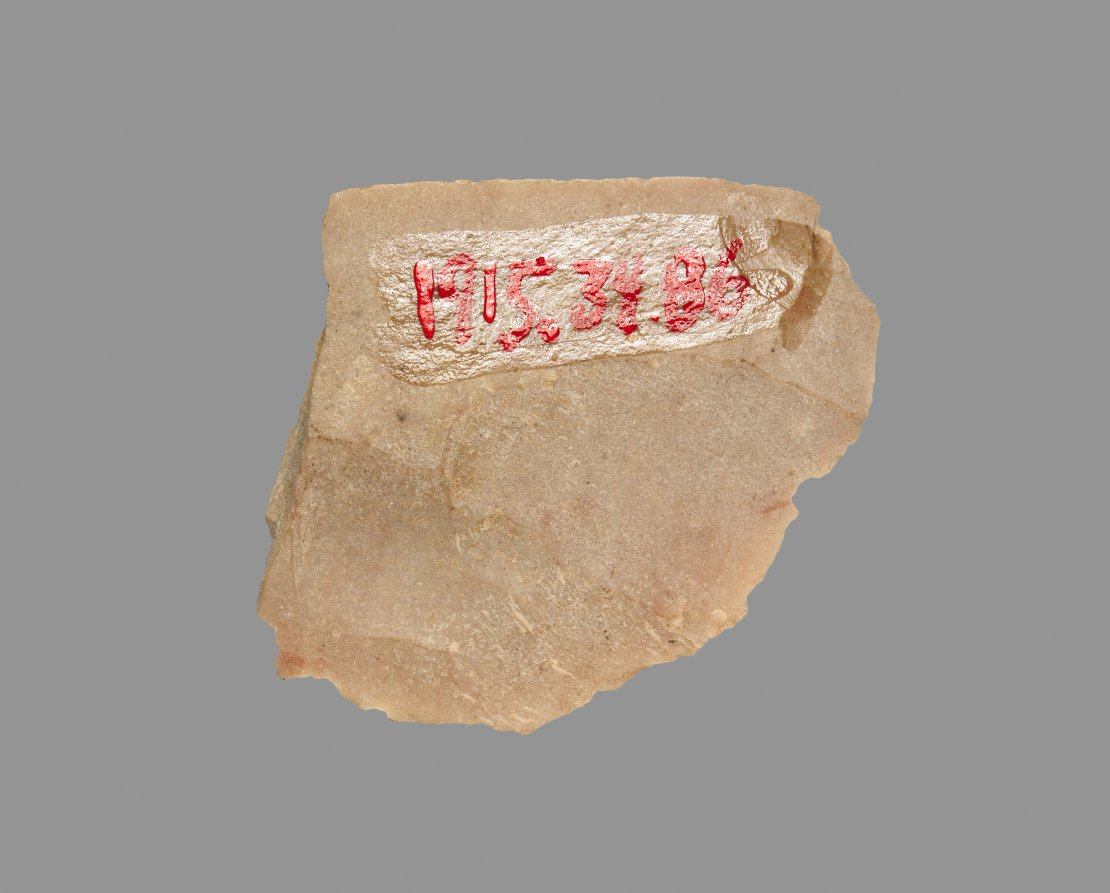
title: Sickle Blade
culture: Egypt, Middle Kingdom (2040–1648 BCE), Dynasty 12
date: 1980–1801 BCE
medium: flint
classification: Implements